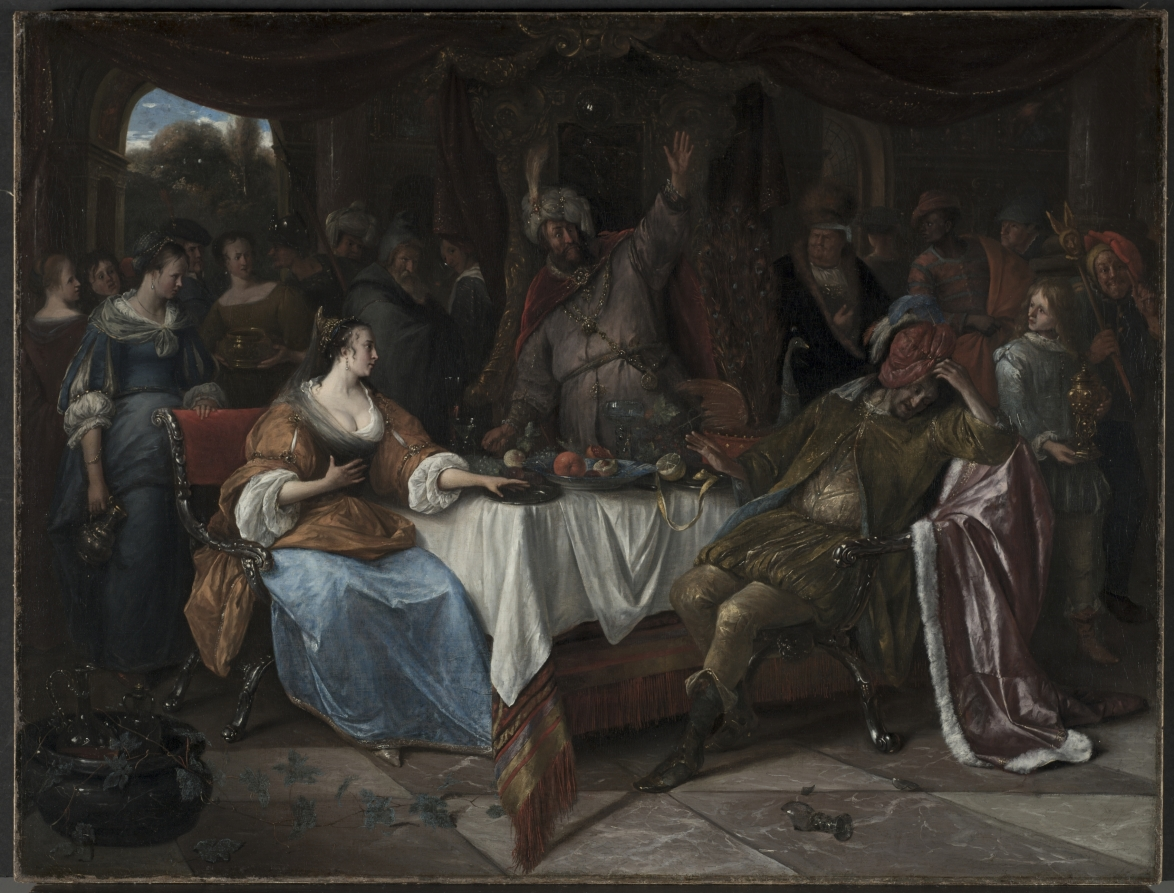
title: Esther, Ahasuerus, and Haman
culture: Netherlands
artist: Jan Steen (Dutch, 1626–1679)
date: c. 1668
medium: oil on canvas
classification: Painting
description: Esther, the wife of the Persian king Ahasuerus, effectively concealed her Jewish identity until the prime minister Haman hatched a plot to annihilate the kingdom’s Jews. To save her people Esther persuades the king (at the center) to rescind his order. He then turns against Haman, who slumps in his seat, aware of his sudden fall from power and his bleak future.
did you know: At the center of this biblical scene, Steen included elements of a typical Dutch still life: a Roemer glass, a half-peeled lemon, and a blue-and-white porcelain dish.